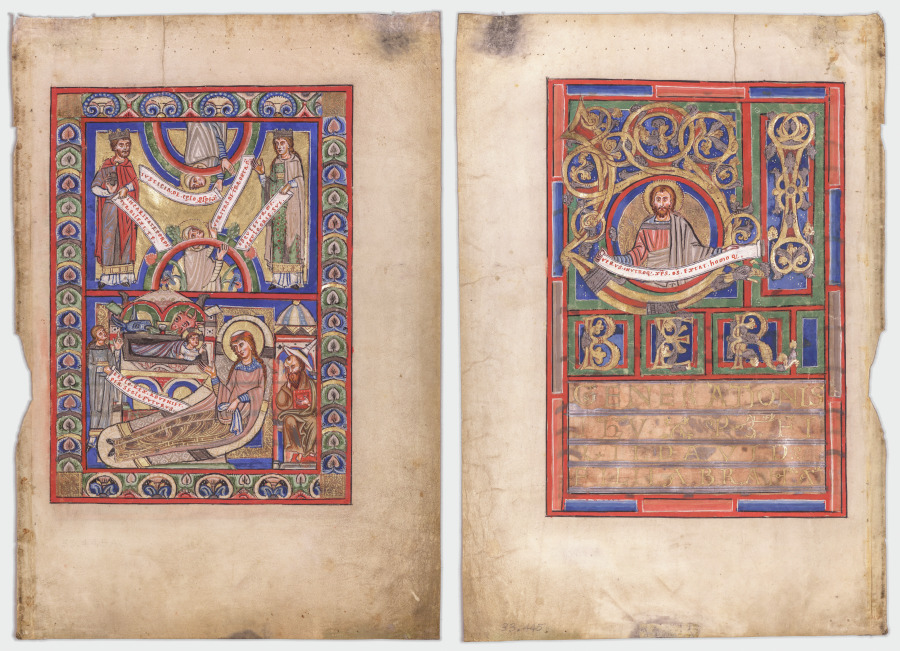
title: Single Leaf Excised from a Gospel Book: The Nativity (recto) and St. Matthew (verso)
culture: Germany, Helmarshausen Abbey, 12th century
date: c. 1190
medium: ink, tempera, silver, and gold on vellum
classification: Manuscript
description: This leaf comes from a volume that is preserved in the Trier Cathedral Library in Germany (Codex 142).